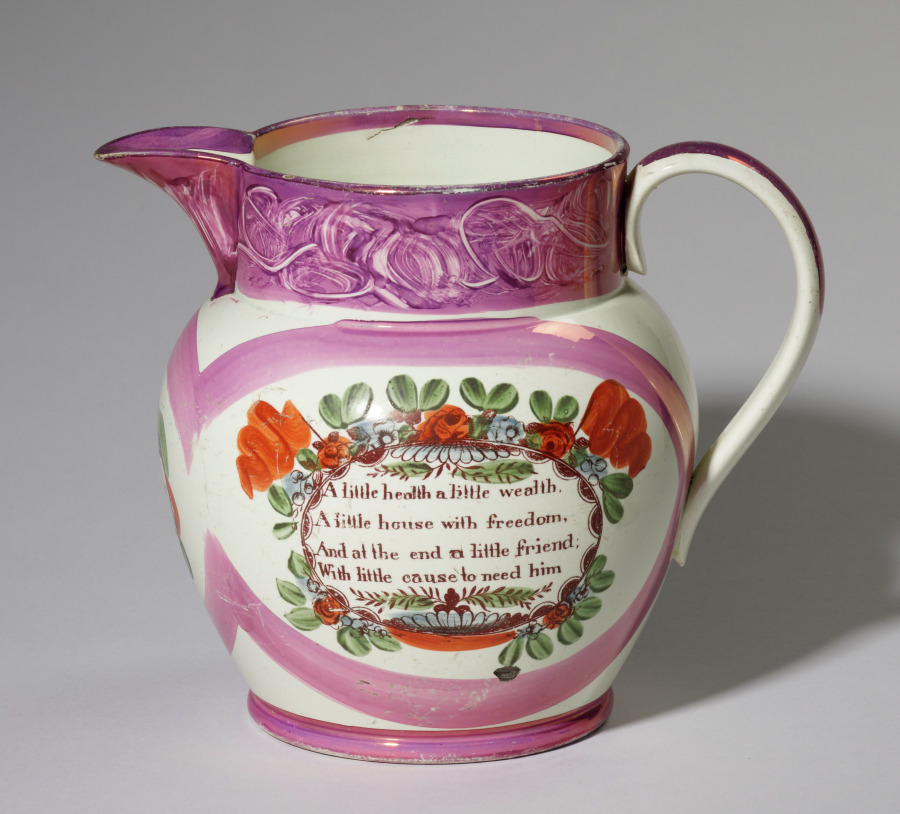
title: Masonic Pitcher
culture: England, Staffordshire, late 18th-early 19th Century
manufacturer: Staffordshire Factory (British)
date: c. 1800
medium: pottery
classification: Ceramic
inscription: on front: "MASON'S ARMS"; on one side: "A little health a little wealth, a little house with freedom, And at the end a little friend With little cause to need him"; on other side: "Here's to you My Jovial brother, When this is out We'll have another."